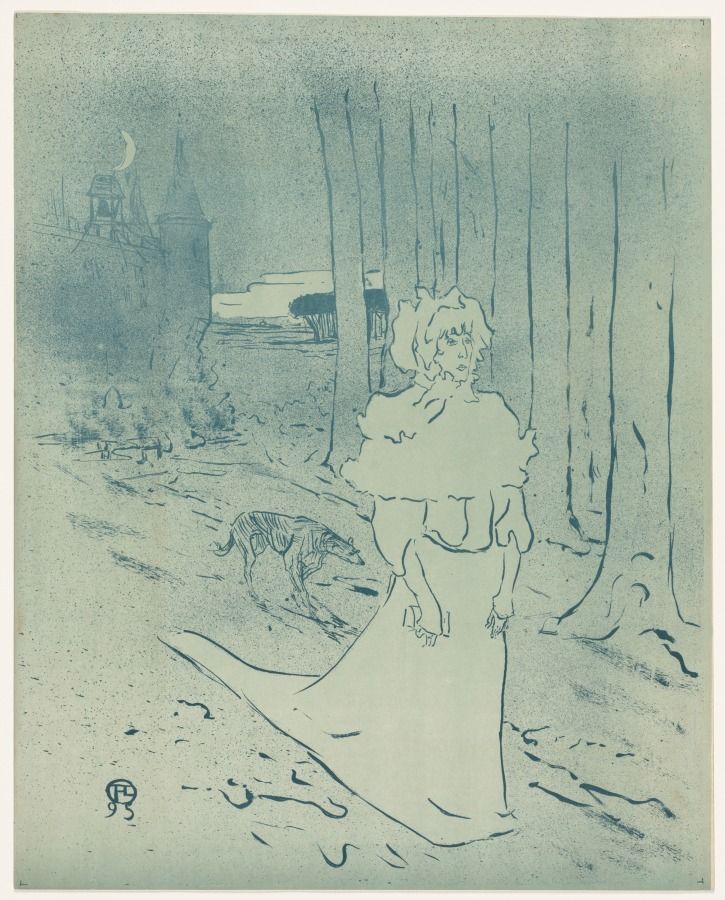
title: The Chatelaine or the Tocsin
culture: France, 19th century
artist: Henri de Toulouse-Lautrec (French, 1864–1901)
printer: printed by Cassan Fils, Toulouse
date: 1895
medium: color lithograph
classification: Print